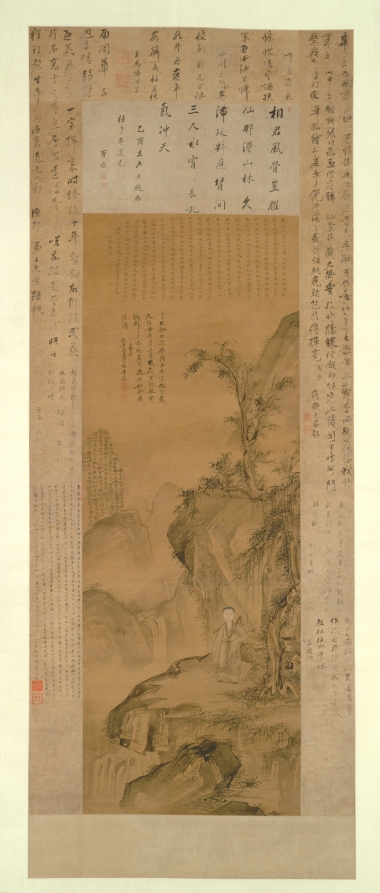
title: Layered Peaks and Splashing Waterfall: Portrait of Hua Yan as a Young Man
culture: China, Qing dynasty (1644-1911)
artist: Hua Yan (Chinese, 1682–c. 1765)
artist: and Wei Shijie (Chinese, 1667–after 1747)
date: 1705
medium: Hanging scroll; ink and color on silk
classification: Painting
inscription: 寫照余非擅，營圖爾自高。/ 偶然裁尺幅，毋待著三豪。/ 護嶺笙疑徹，豐誠劍且韜。/ 懸崖對飛雪，如聼廣陵濤。/ 士傑為秋岳道盟作小影並題。 [印]：魏士傑，子良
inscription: 僕自棄孤，乍設己隨四方。蓬根飄零，竟成浩嘆。 媿窮途於阮籍。十年悔不讀書。羞問字之侯芭。千里何曾負笈。而況匡廬既遠。空懐飛雪之崖。延津未遥，莫辯化龍之劍。 慈親在望，空事遠游。杜宇為聲，不如歸去。嗟乎，半生岐途，未免亡羊。百尺竿頭，如何進歩。 從前孟浪，圖此猖狂。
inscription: Top inscription on the painting by Jiang Hongdao 將弘道, dated yiyou, the forty-fourth year of the Kangxi era (1705)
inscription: Seven additional colophons on the silk mounting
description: This portrait was jointly executed by Wei Shijie and Hua Yan himself who painted the landscape in the background. Hua Yan is shown here at the age of about 23. The sword at his back is a reference to his early desire for a military career, while the scholar’s robe suggests an opposing aspiration. Together these are signs of a complex personality. The painting also reveals Hua Yan’s early talent in painting. While Wei Shijie is little known, Hua Yan would later become a well-known painter. In addition to Wei Shijie and Hua Yan, nine of Hua Yan’s contemporary friends left inscriptions on the painting.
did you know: Hua Yan's autobiographical inscription, full of remorse and insecurity, is squeezed into the contour of a hill in the upper left.